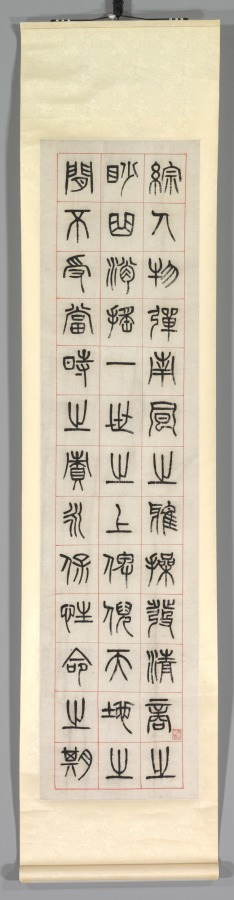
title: On Happiness, Calligraphy in Seal Script Style (zhuanshu)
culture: China, Changsu, Qing dynasty (1644-1911)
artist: Yang Yisun (Chinese, 1813–1881)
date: 1871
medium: hanging scroll, ink on paper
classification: Painting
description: Yang Yisun transcribed this ancient text on six narrow scrolls, starting at the top right and ending at the bottom left. Yang emphasizes the text’s historic nature by using the seal script style found on stone steles and bronze vessels. On Happiness features reflections of a scholar on a leisurely life in the countryside, composed by Han dynasty official Zhongchang Tong, who died the year the Han dynasty collapsed (AD 220). The idyllic life described in the text may bean evocation of the past in a time of national crisis. A decade before Yang wrote these scrolls, Anglo-French forces had looted and burned the Summer Palace in Beijing. At the same time, the domestic Taiping rebellion (1850–64), led by a religious fanatic to overthrow the Qing government, had devastated Yang’s homeland, the Jiangnan region, with an estimated 20 million lives lost.